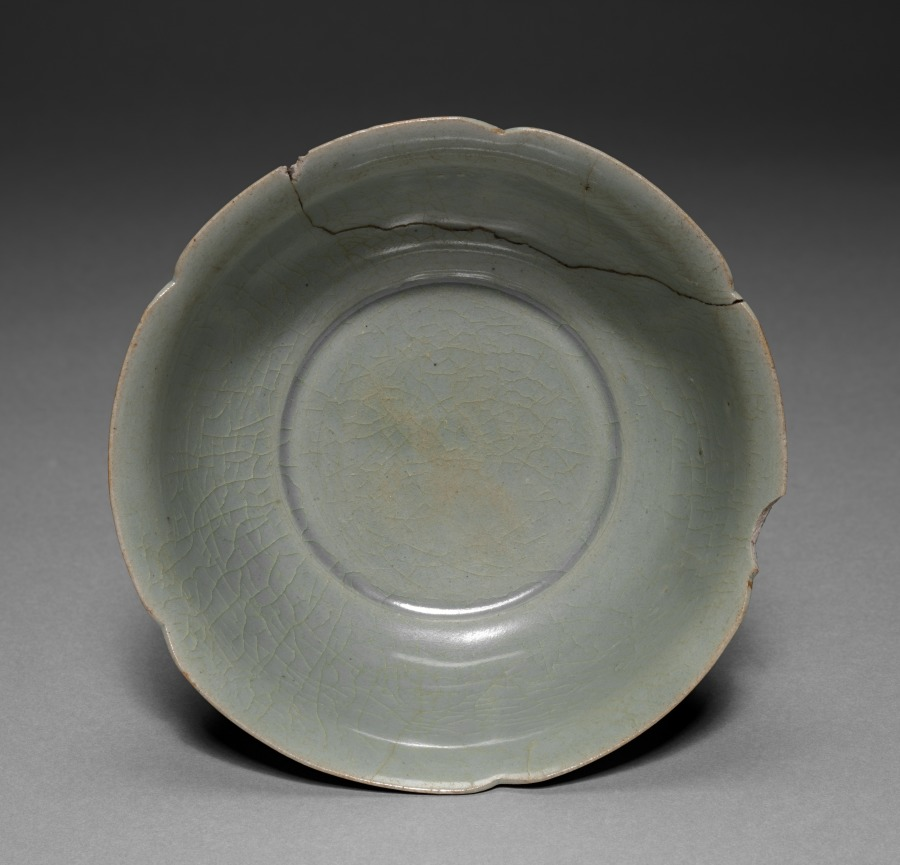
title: Floral-shaped Bowl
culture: Korea, Goryeo dynasty (918–1392)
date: 1100s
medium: Ceramic, glazed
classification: Ceramic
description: Celadons, spoons, seals, and bronze mirrors were the most common burial objects in tombs during the Goryeo period (918–1392). Furnishing tombs with an elaborate assemblage of objects was believed to honor and comfort the newly dead. Generally, Goryeo tombs were left untouched until the late 19th century. During the colonial period (1910–45), however, Japanese archaeologists competitively excavated the tombs located in Kaeseong, the former capital of the Goryeo period. This elegant floral-shaped cup was probably one of those grave goods excavated during the Japanese colonial period.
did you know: Elites of the Goryeo period are known for their love of drinking tea and wine. This type of delicate-looking cup not only made their drinking experience more enjoyable, but also showed their refined taste.